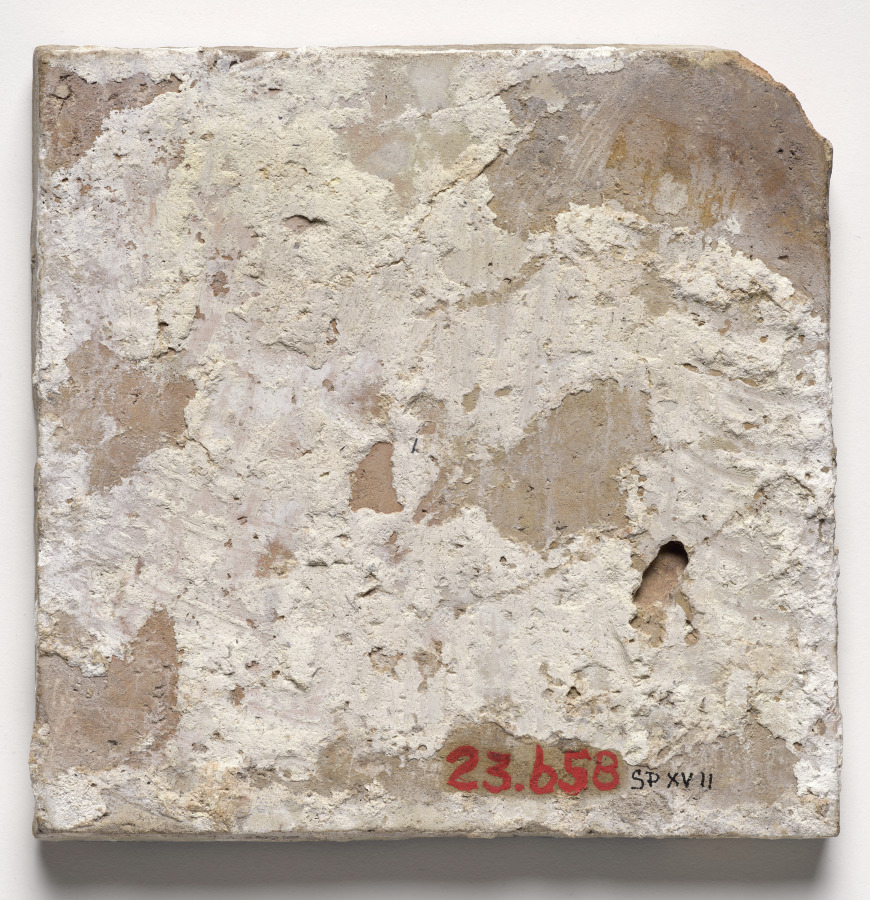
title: Wall Tile–Floral Spray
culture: Spain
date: c. 1600s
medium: glazed ceramic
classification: Ceramic